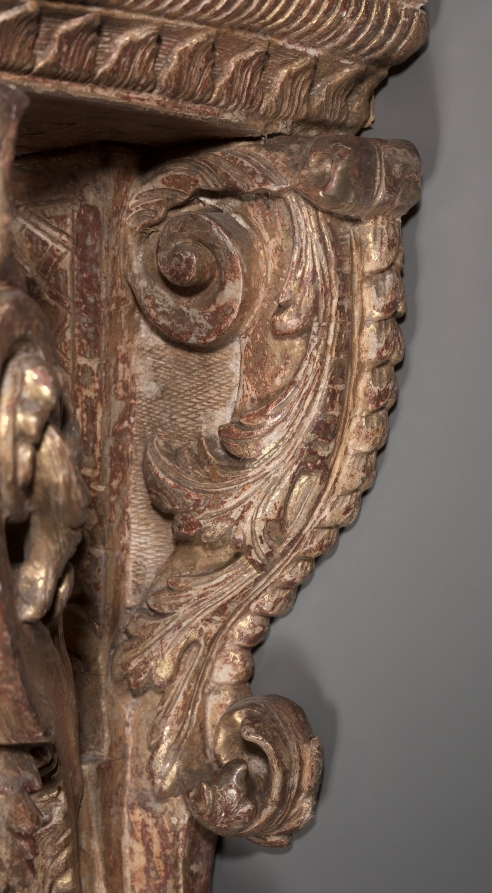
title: Wall Bracket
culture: France, 17th century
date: c. 1650–75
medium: carved and gilt wood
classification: Furniture and woodwork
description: The carved decoration depicts Hercules and the Nemean lion.